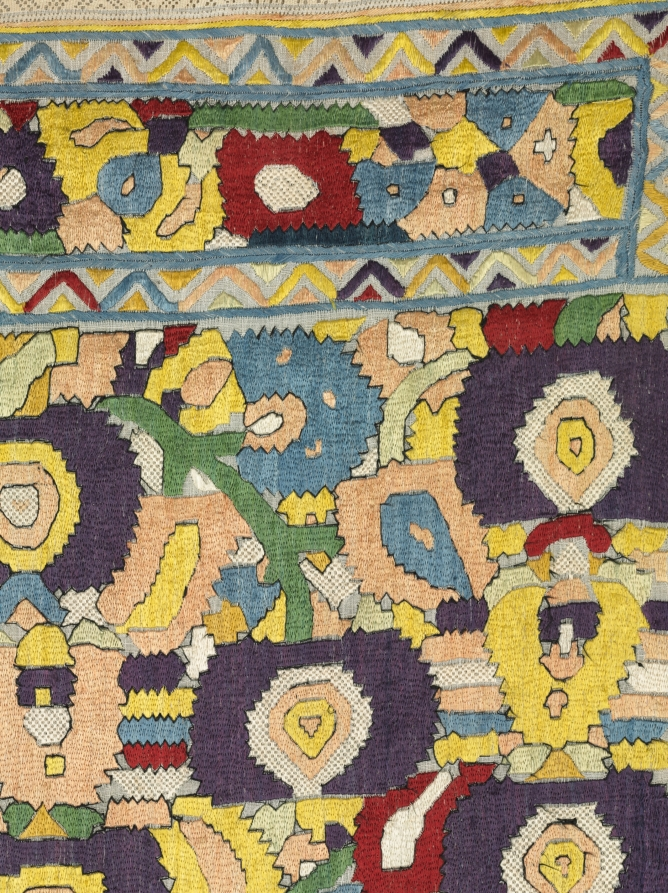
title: Mirror cover (tensifa)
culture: Africa, North Africa, Morocco, Tétouan, Moroccan embroiderer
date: 1700s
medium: Linen, silk, dye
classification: Embroidery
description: Special embroidered textiles were used by newylwed Moroccan couples to cover the mirror in their home. This was done to protect them from the evil eye and unfavorable gazes.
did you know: Satin stitch is used to produce the broad, smooth surface of the floral patterns seen here.